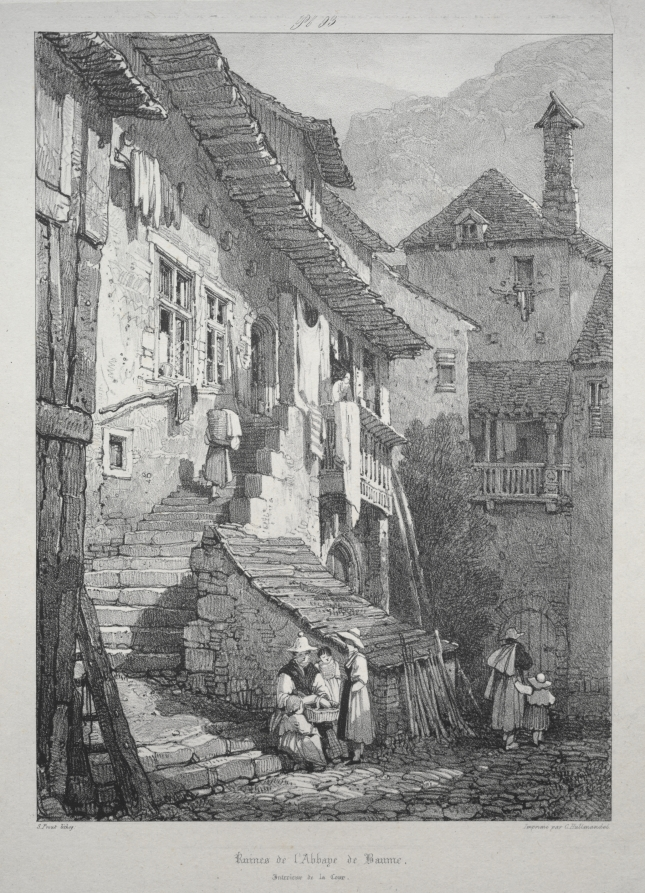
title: Ruins of the Abbey of Baume. Interior of the Court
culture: England, 19th century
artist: Samuel Prout (British, 1783–1852)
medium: lithograph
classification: Print